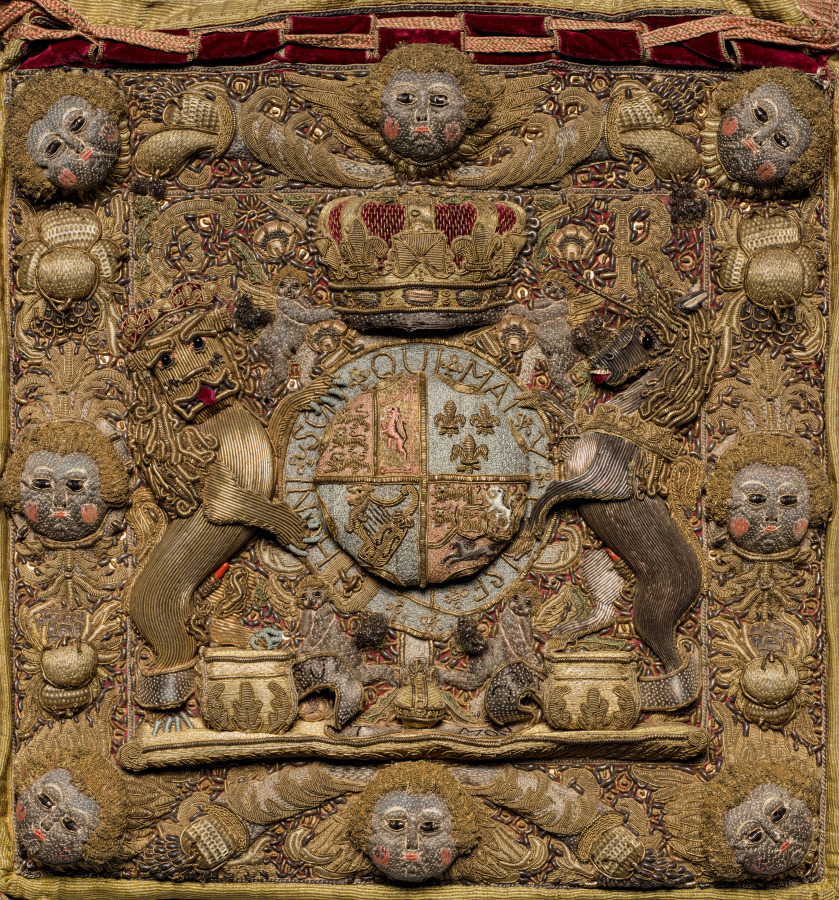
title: Lord Chancellor's Burse (Purse) with Royal Cypher and Coat of Arms of George III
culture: England, 18th century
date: 1700s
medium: red silk velvet, silk embroidery, goldwork, pearls, black beads, sequins, pendant tassels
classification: Velvet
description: A richly decorated burse (purse) to hold the monarch's Great Seal of the Realm has a traditional role in the opening of parliament. The safekeeping of the seal was the responsibility of the Keeper of the Great Seal, an office later incorporated into the role of Lord Chancellor. Because the Great Seal was attached to all major documents of state, it was the ultimate symbol of royal authority. The use of a special burse to hold the seal can be traced back to the end of the 13th century. By the end of the 16th century, the burse had evolved into the highly decorated, professional work of embroidery seen in this object. It includes the lion and unicorn surrounding the royal crest and is made from crimson velvet. Burses were replaced annually; it being a "perk" of office that the Lord Chancellor and Keeper of the Great Seal was allowed to keep the fragments of the old seal and accompanying burse. Portraits of Lord Chancellors, from the Tudor period onward, depict them with their burse. Cleveland’s collection includes one such portrait by American artist Gilbert Stuart (1755–1828) of Irish Lord Chancellor John FitzGibbon, 1st Earl of Clare (1748–1802) who was Lord Chancellor from 1789 to 1802. Baron FitzGibbon’s portrait (1919.910) is on view in gallery 204.